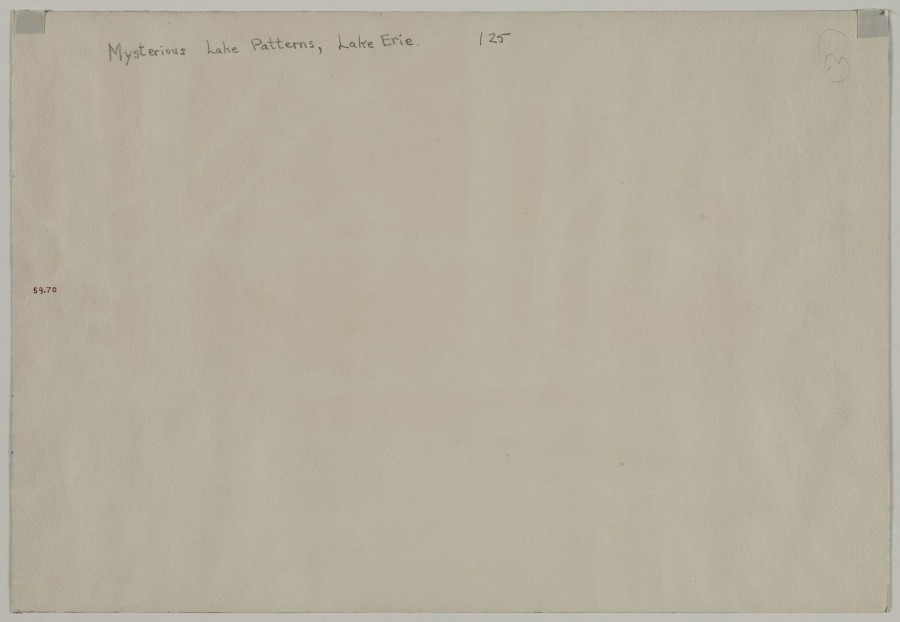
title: Mysterious Lake Patterns, Lake Erie (Study for Lake Erie Patterns)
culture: America, Ohio, Cleveland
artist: Clarence Holbrook Carter (American, 1904–2000)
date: c. 1930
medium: Watercolor with black chalk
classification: Drawing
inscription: Inscribed lower right, in brown watercolor: Clarence H. Carter. 20 Verso, upper left in graphite: Mysterious Lake Patterns, Lake Erie. 125